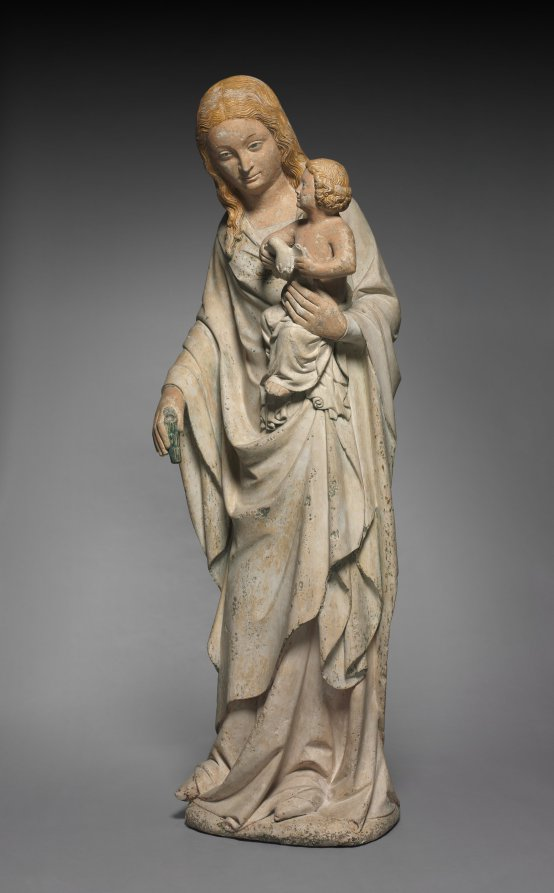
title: Virgin and Child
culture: France, Loire Valley, 14th century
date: c. 1385–90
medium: limestone with traces of polychromy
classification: Sculpture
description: The vibrant naturalism of the Virgin’s face and long flowing hair, as well as the deep, rich folds of drapery are characteristic of the work of itinerant artists from the Netherlands who found employment at the Valois courts of France at Paris, Berry, and Burgundy. Their native styles and attention to realistic detail fused with native French artistic traditions toward the end of the 14th century and took root. The original source of this Virgin and Child is unknown, but its style suggests a relationship with similar sculptures made for churches and abbeys of the Central Loire Valley. The additional influence of the style of the sculptor André Beauneveu has also been noted for this sculpture. His commissions were abundant and his influence widespread. The sculptor of this work appears to have had some knowledge of Beauneveu’s work in the Loire region.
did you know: This sculpture was painted over many times over its history, common for medieval sculpture.